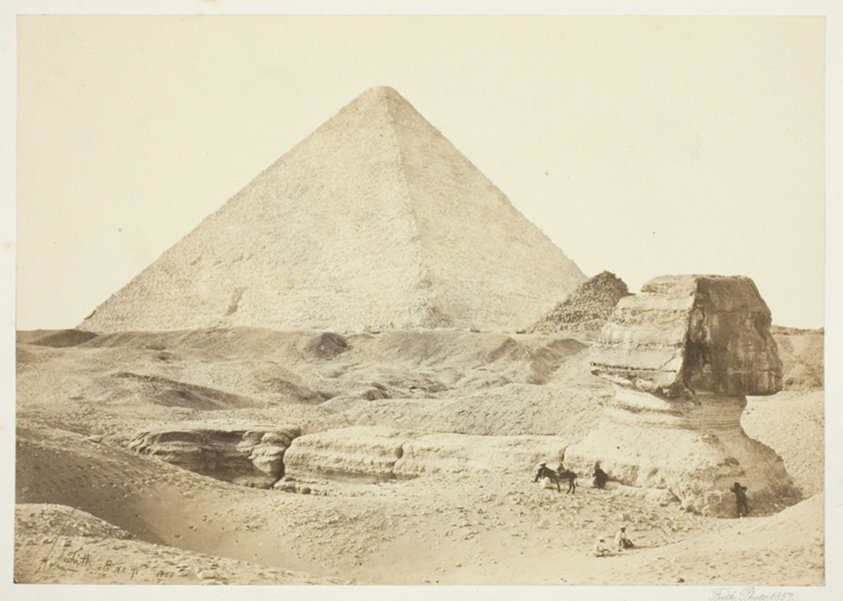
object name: Photograph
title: The Sphynx and Great Pyramid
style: 19th century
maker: Francis Frith (English, 1822–1898)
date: 1857, printed 1862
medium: Albumen print, from the album "Egypt, Palestine, Nubia" (1862)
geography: England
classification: albumen silver print; photographic process; photography; photograph